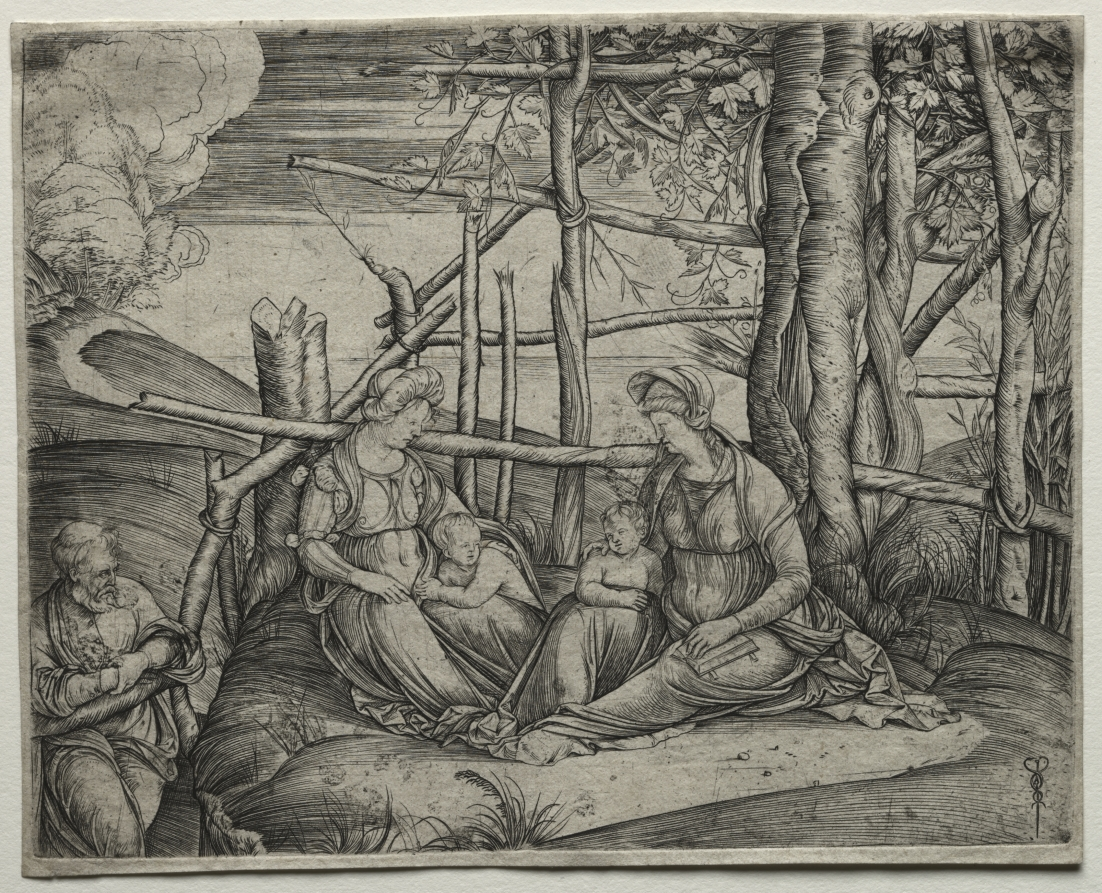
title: The Holy Family with Saint Elizabeth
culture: Italy, 16th century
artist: Jacopo de' Barbari (Italian, c. 1460/70–c. 1516)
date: c. 1503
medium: engraving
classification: Print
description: While this landscape might seem desolate and strange, it is rife with religious symbolism. The Virgin Mary and Christ on the right sit with Mary’s cousin, Saint Elizabeth, and her son, Saint John the Baptist. The Bible describes Elizabeth as past childbearing age; both she and Mary were granted virgin births by God. The barren trees, therefore, signify Elizabeth’s infertility, while the fencelike enclosure denotes the enclosed garden of virginity. The trees also remind viewers of Eve’s sin in the Garden of Eden. Jacopo de’ Barbari placed lively grapevines on the dying trees, a metaphor for Christ.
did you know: Before scholars identified all the works of Jacopo de' Barbari by name, he was called "Master of the Caduceus" for the symbol of a Mercury's staff with which he often signed his prints, seen here at lower right.